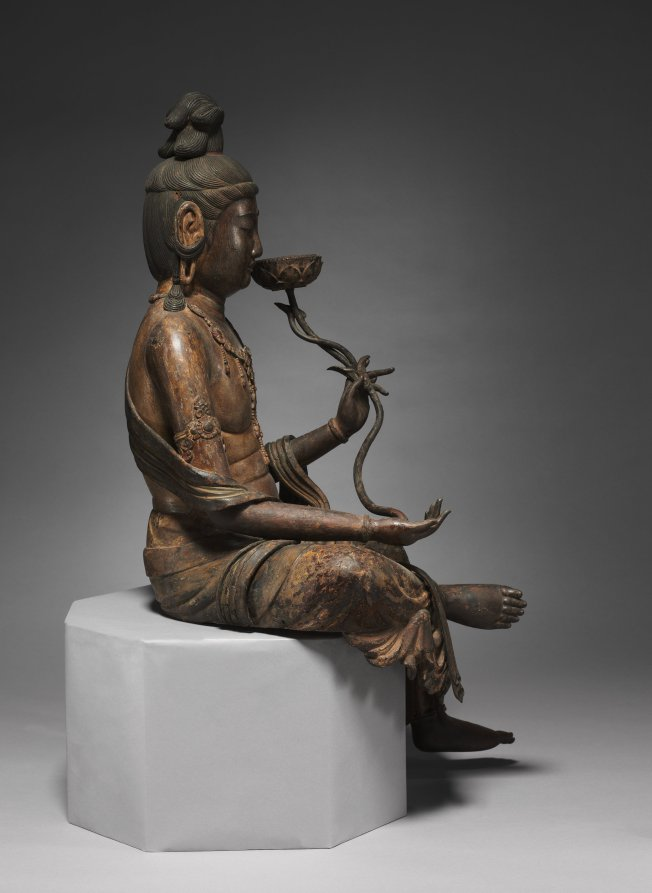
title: Bodhisattva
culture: Japan, Kamakura period (1185–1333)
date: mid-1200s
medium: wood with traces of lacquer, polychromy, and cut gold lear (kirikane)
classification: Sculpture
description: A Bosatsu (Bodhisattva in Sanskrit) is a being that has attained enlightenment but has compassionately refrained from entering nirvana in order to save others. As an attendant of Buddha, Bosatsu assumes many forms, all of which are worshipped as deities in Japanese Buddhism.